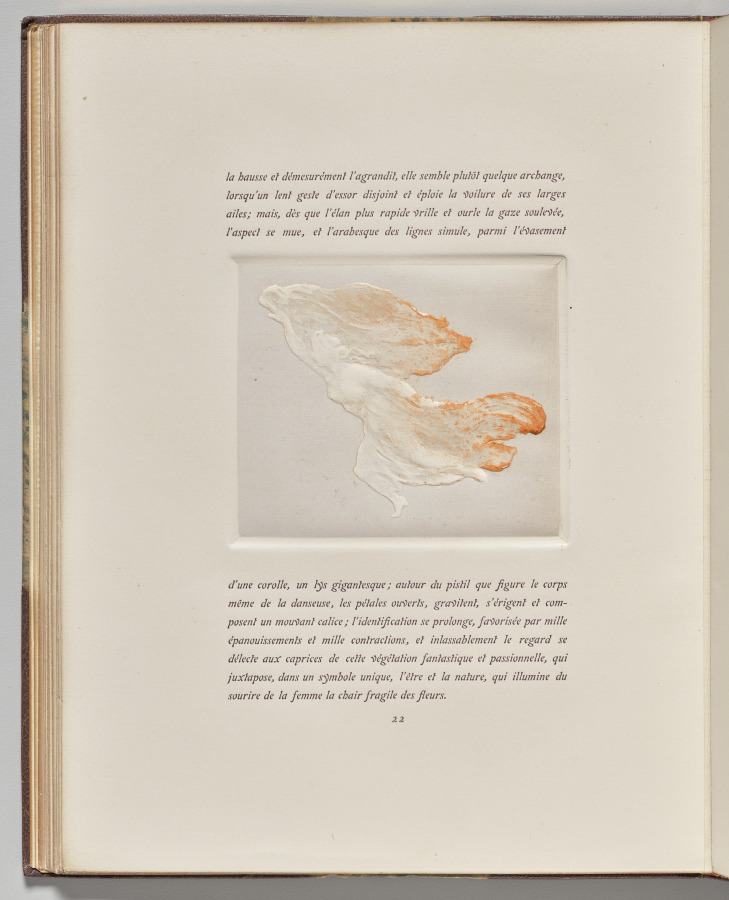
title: Dancing Woman in Running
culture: France, early 20th Century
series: La Loïe Fuller, by Roger Marx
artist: Pierre Roche (French, 1855–1922)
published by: Les Cents Bibliophiles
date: 1904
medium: gypsograph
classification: Bound Volume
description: Although best known as a sculptor, Roche was a versatile and prolific artist who worked in many mediums. Loïe Fuller, the pioneer of modern dance who took Paris by storm in 1892, was one of his favorite subjects. He portrayed her in clay, bronze, marble, plaster, and in a series of gypsographs that illustrated an essay by the art critic Roger Marx. The book was described as "a precious monument to Loïe Fuller."